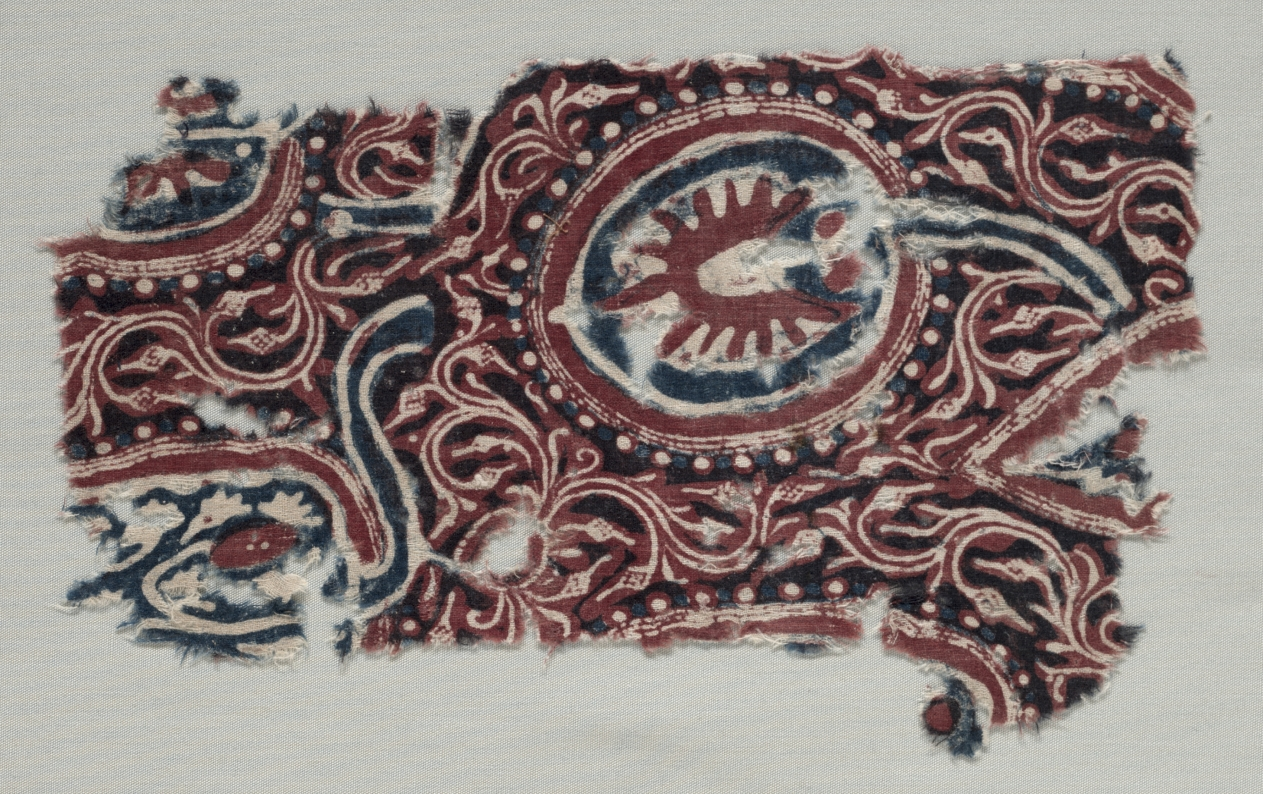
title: Fragment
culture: India, 15th century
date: 1400s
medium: drawn resist, painted mordant, dyed; cotton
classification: Textile